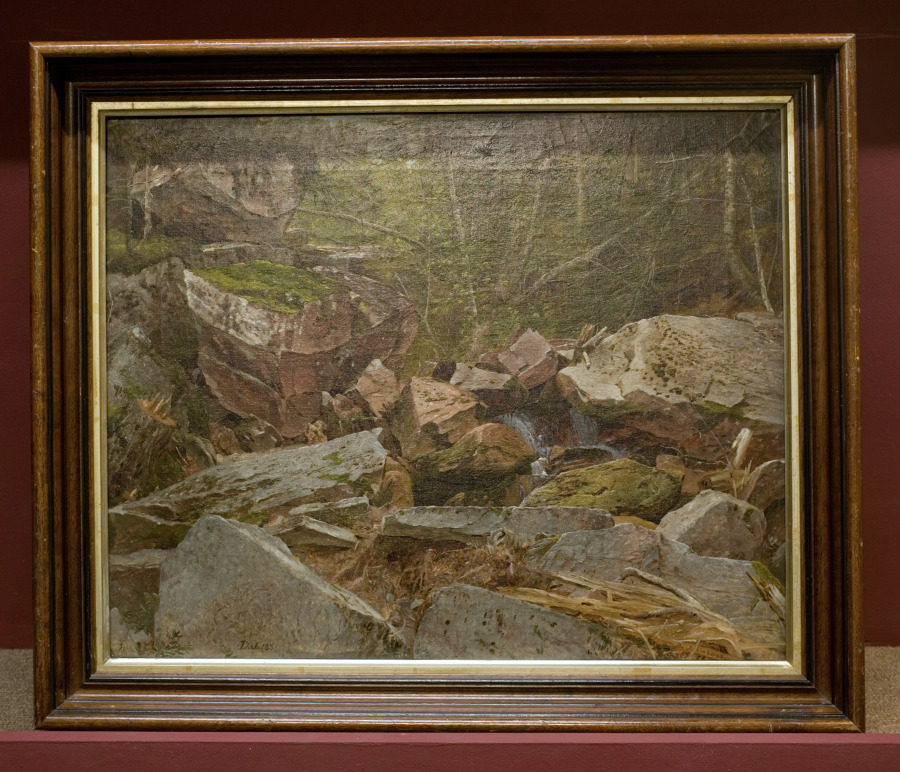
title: Study, North Conway, New Hampshire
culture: America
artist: David Johnson (American, 1827–1908)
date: 1851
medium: oil on canvas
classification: Painting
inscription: Signed lower right: "D. Johnson. / 1851"; inscribed lower left: "D.J. 1851. (false); signed on the back: "Study. North Conway. N.H. / David Johnson 1851]"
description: Johnson’s devotion to carefully observing nature is evident in his detailed rendering of a riverbed. Located in a village that provided a popular jumping-off point for tourists visiting the White Mountains, this untamed site features a haphazard arrangement of angled boulders, slippery moss, splintered tree branches, and dense undergrowth. Contemporary travel guidebooks often cautioned against the physical challenges—and the potential for injury—encountered by venturing into such inner recesses of the woods; one warned that “wild forest-clambering” could be akin to “fighting a phalanx of porcupines.”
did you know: North Conway, New Hampshire, markets itself as the birthplace of American skiing.